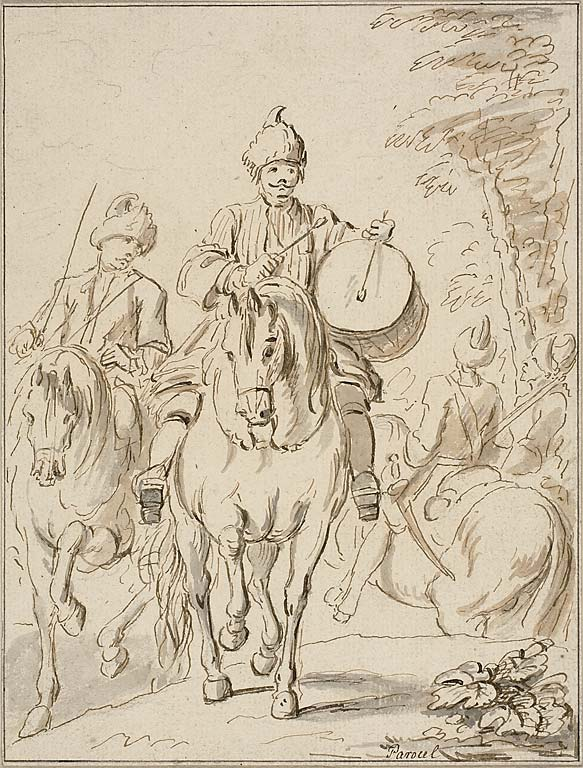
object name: Drawing and Watercolor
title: Oriental Riders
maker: Charles Parrocel (French, 1688-1752)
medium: Pen and brown ink, with brush and gray and brown wash, over traces of graphite, on ivory laid paper, tipped onto buff laid paper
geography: France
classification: pen and ink drawings; drawings (visual works); prints and drawing